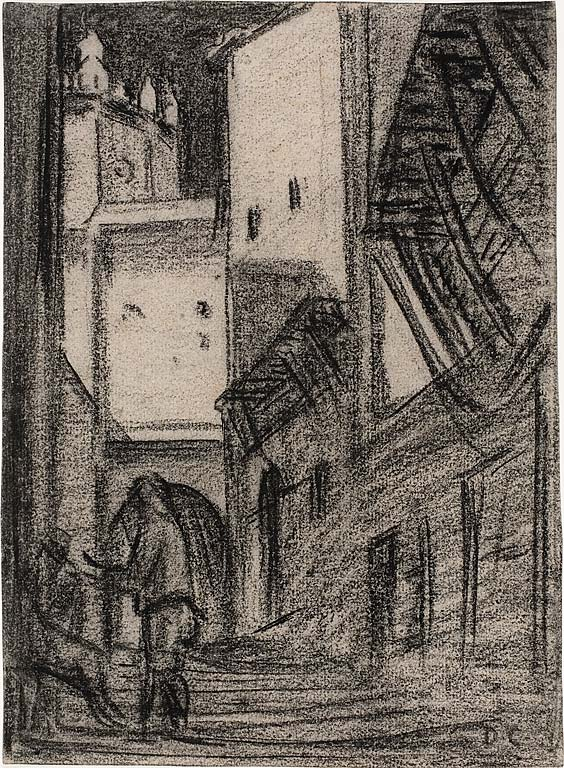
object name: Drawing and Watercolor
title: North African Street Scene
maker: Alexandre Gabriel Decamps (French, 1803-1860)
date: c. 1836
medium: Black pastel, on tan laid paper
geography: France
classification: pastel; drawings (visual works); prints and drawing